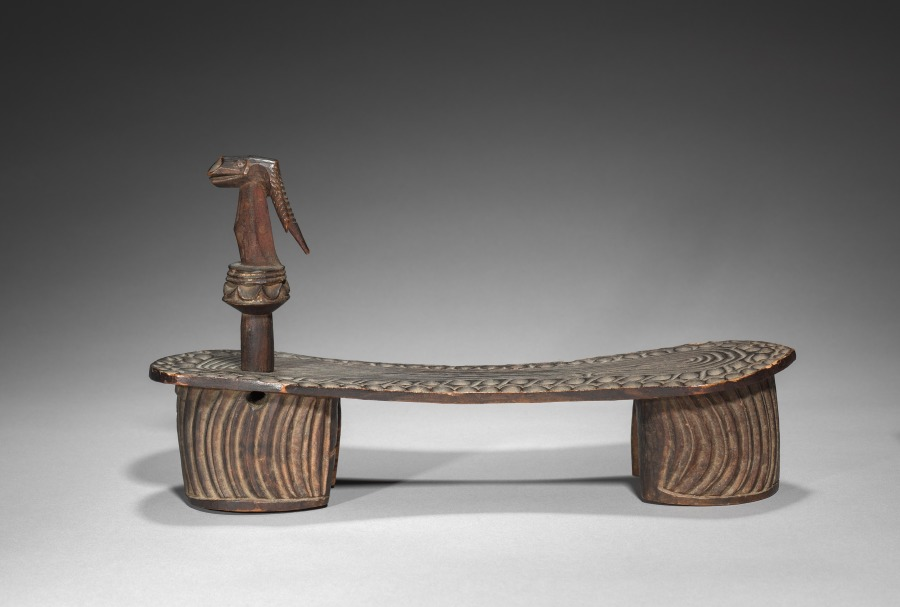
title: Sandal (mtalawanda / mtawanda) or Clog (kiatu cha mti)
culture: Africa, Central Africa, Democratic Republic of Congo, unidentified carver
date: c 1800s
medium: Wood and glass beads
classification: Wood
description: Common in the Indian Ocean region, wooden sandals changed meaning across place and time. This pair’s base elevates the foot as the toes grip an antelope-shaped peg (msuruaki). Crisp geometric sole designs suggest they were rarely worn. East African elites and merchants once had exclusive rights to wooden shoes, wearing elaborate ones only for portraits. Formerly enslaved people living along the coast wore simpler ones from the 1840s onward, adopting elite footwear to assert their liberation. However, slave traders like the Zanzibari “Tippu Tip” (c. 1832–1905) likely brought mitalawanda to Central Africa; stylistic elements of this pair hail from that region.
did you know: This distinctive footwear traveled from Southeast Asia and the Middle East to Africa, first to the Swahili Coast and then further inland to parts of Central Africa. The deity Krishna wears similar shoes (paduka) in an eighteenth-century Indian miniature painting (2003.344).